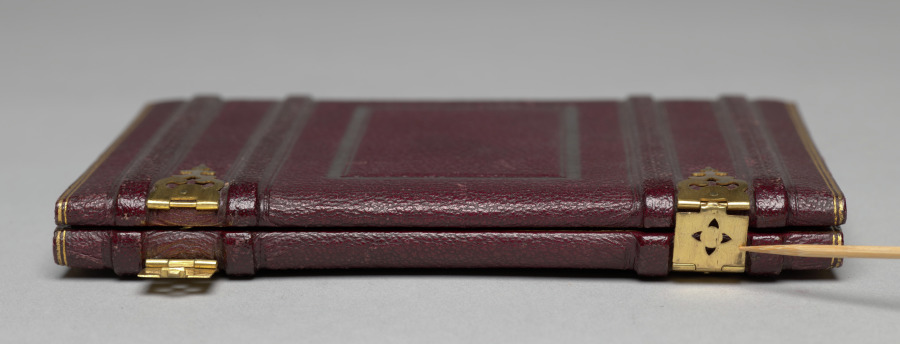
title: English family of five with marble bust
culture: England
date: 1850–65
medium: ambrotype, half plate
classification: Photograph